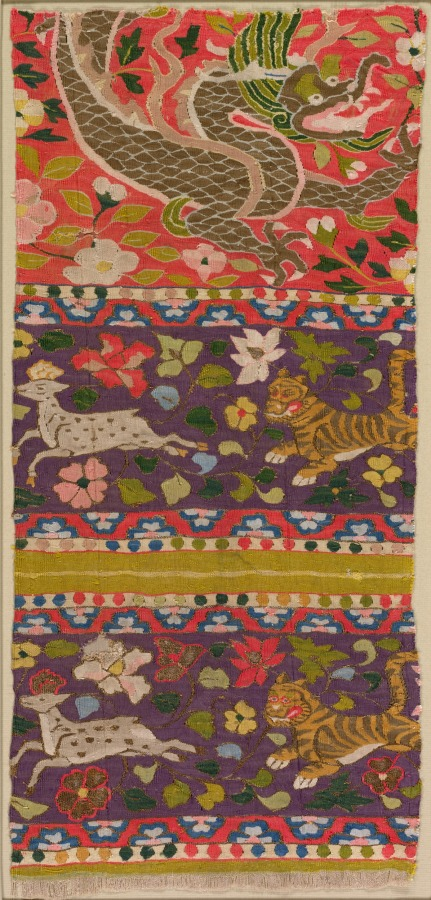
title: Tigers Chasing Deer, with Dragon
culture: China, Eastern, 11th-12th century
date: 1000s–1200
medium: Silk and gold thread; tapestry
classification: Textile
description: This reversible tapestry (kesi) fragment woven with silk and metal thread is a section from yardage likely intended for a garment, but no contemporary paintings exist to confirm this. The starting, bottom edge of the textile is preserved which indicates the bands at the base would have been the cuff ends of a garment. The design motifs of this kesi—a dragon at the top, bands of pearls and split palmettes, and tigers chasing deer with mushroom-shaped antlers—are a synthesis of Western and Chinese elements. The pearls, palmettes, and deer motifs originated in Iran and Sogdiana (an area east of the Caspian Sea and northwest of the Himalayas) but migrated east to China during the Tang dynasty (618–907). Although these motifs disappeared from Chinese art after the fall of the Tang, they survived in Central Asia. In contrast, the dragon is Chinese in origin, but here has a Central Asian form (particularly its extended snout).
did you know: Two similar kesi in Cleveland’s collection include 1991.3 and 1988.33. All are roughly the same size and given their size all three rectangular fragments may have been used as sutra (prayer leaves) covers. All three have two vertical crease lines that divide the fragment roughly into thirds and differential fading between the central third and outer thirds, which further substantiates this possible usage.